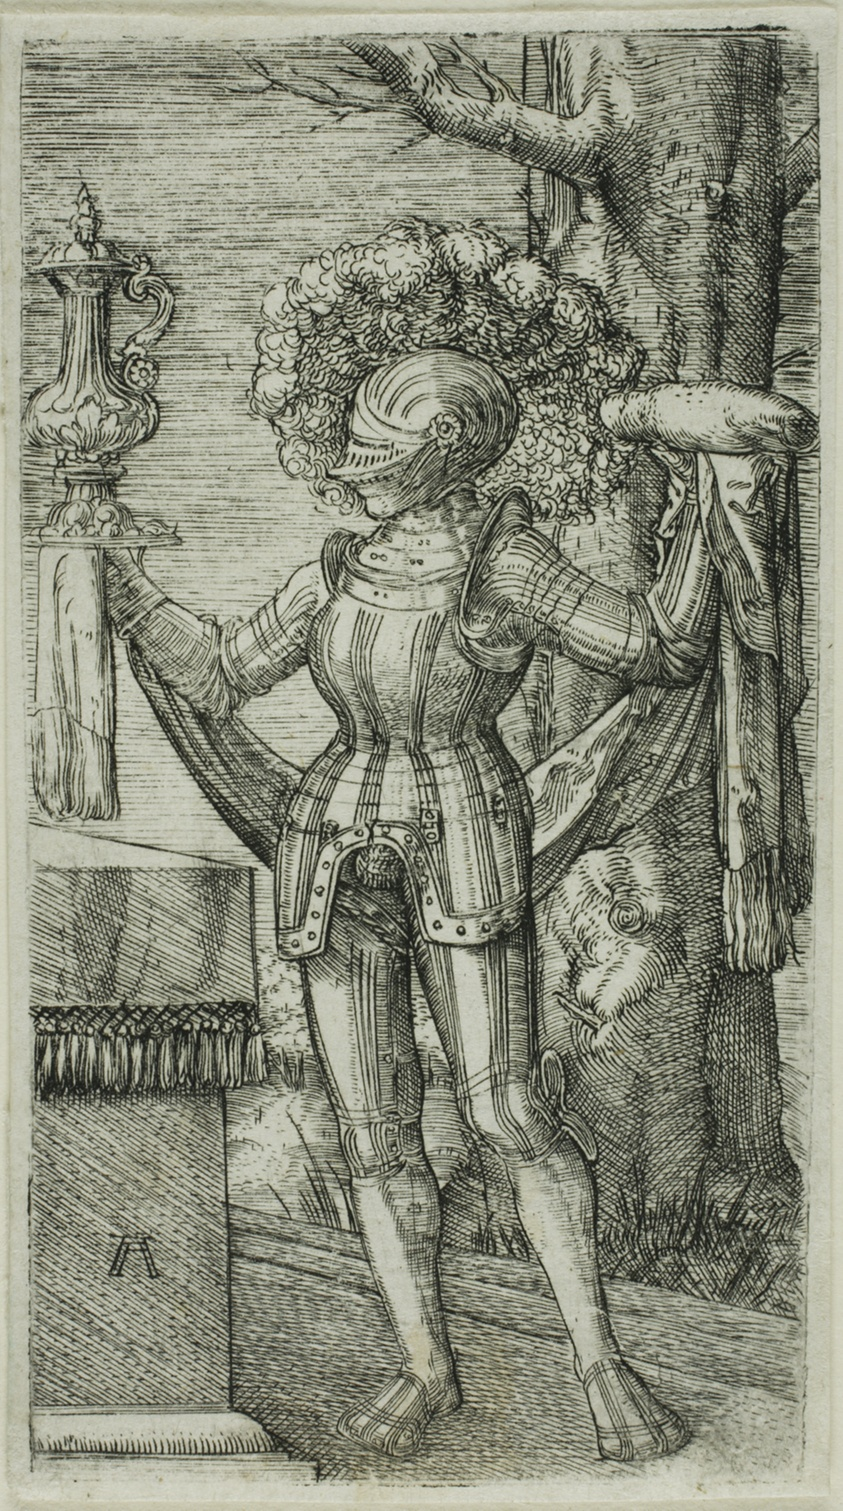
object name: Print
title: Knight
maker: Albrecht Altdorfer (German, c.1480-1538)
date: 1512/1515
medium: Engraving in black on ivory laid paper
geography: Germany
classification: engraving; print; prints and drawing